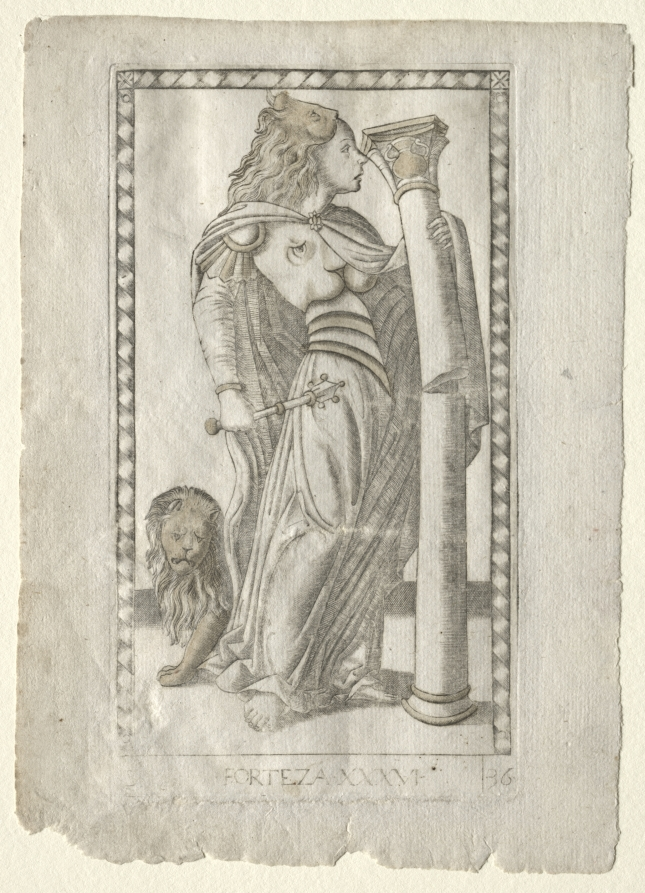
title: Forteza (from the Tarocchi, series B: Cosmic Principles & Virtues, #36)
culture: Italy, Ferrara, 15th century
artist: Master of the E-Series Tarocchi (Italian, active 1460s)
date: before 1467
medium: engraving, hand-colored with gold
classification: Print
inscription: Lettered below the image of Forteza (Fortitude): [B] / ·FORTEZA·XXXVI· / ·36·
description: This engraving is part of the group marked with the letter “B,” and named Cosmic Principles and the Virtues, which comprises the three Universal principles (Light, Time, and Space) alongside the three theological virtues (Faith, Hope, and Charity) and the four cardinal ones (Prudence, Temperance, Fortitude, and Justice). The latter were regarded as the basic Christian principles required for a virtuous life. Here, Forteza (Fortitude) is represented as a full-length female figure in profile, wearing a lion’s skin on her head and a lion armor. She holds a broken column with her left hand. This gesture alludes to the biblical figure of Samson, who toppled a building, killed his captors, and ultimately himself. Fortitude as a personification of strength is flanked by a lion, her symbol that appears behind her.